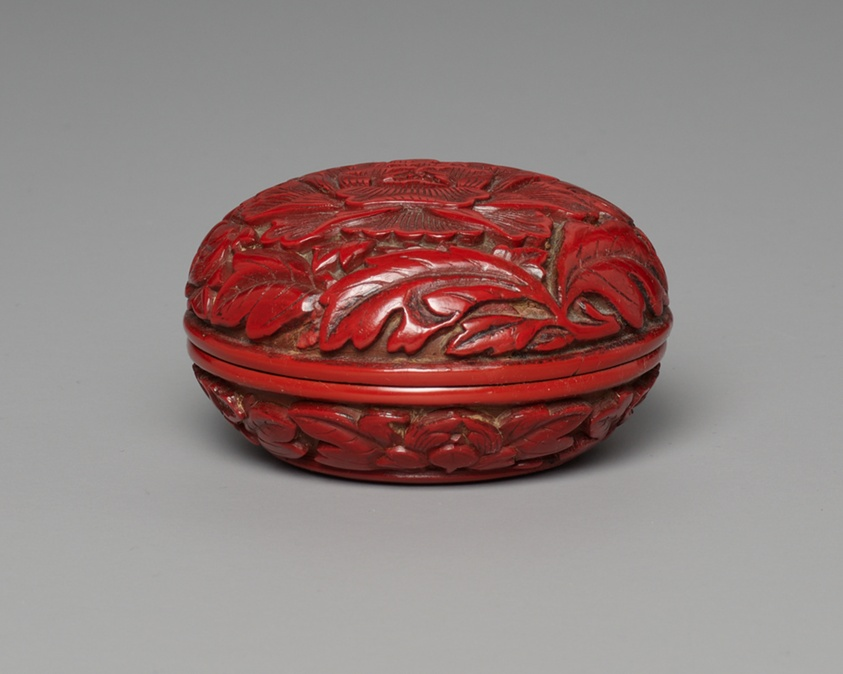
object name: Decorative Arts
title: Seal Paste Box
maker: China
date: Ming Dynasty (1368-1644), 15th century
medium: Carved lacquer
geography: China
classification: lacquer; seal